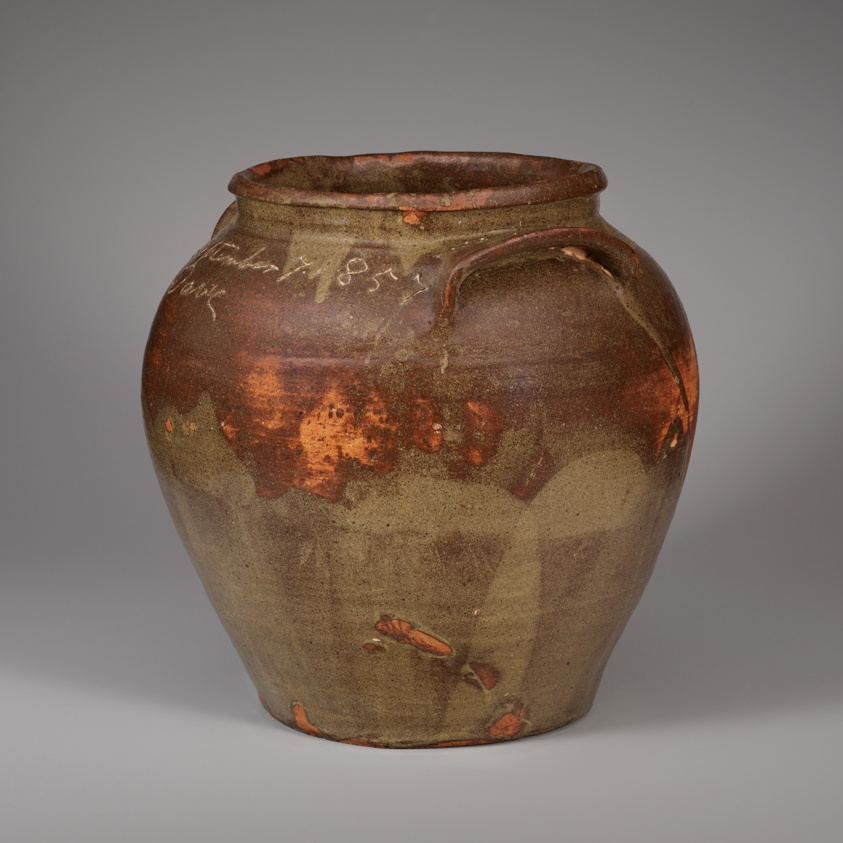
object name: Ceramics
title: Storage Jar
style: 19th century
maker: David Drake (American, c. 1801–1870s); Lewis Miles Stoney Bluff Manufactory [plantation] (American, c. 1840–70s); Edgefield, South Carolina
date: 1857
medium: Stoneware and glaze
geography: Edgefield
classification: container; american decorative arts; pottery; ceramics; stoneware; vessel; decorative arts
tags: storage